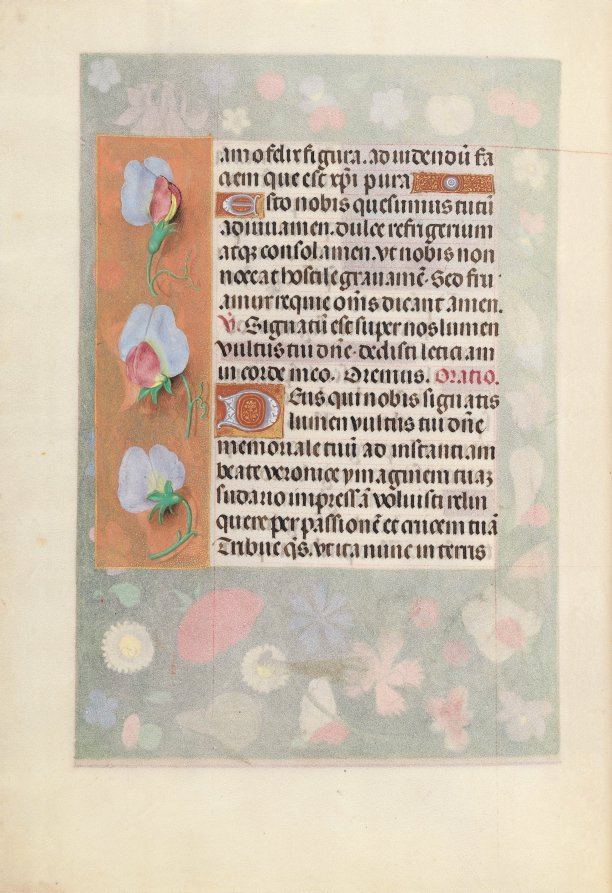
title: Hours of Queen Isabella the Catholic, Queen of Spain: Fol. 15v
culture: Flanders, Ghent and Bruges, late 15th century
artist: Master of the First Prayerbook of Maximillian (Flemish, c. 1444–1519)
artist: and Associates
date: c. 1500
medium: ink, tempera, and gold on vellum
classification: Bound Volume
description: This manuscript was illuminated by a circle of at least five highly organized manuscript painters active in the Flemish cities of Ghent and Bruges. The principal illuminator was Alexander Bening, who painted the majority of the book's miniatures. Manuscripts produced by this circle of artists are renowned for the decoration of their borders, which typically feature a rich variety of realistically-painted flowers, birds, and butterflies. This prayer book, called a book of hours, was intended not for a cleric, but for the private devotions of a lay person-in this case, Isabella the Catholic, Queen of Spain (1451-1504). Isabella's coat of arms embellishes the book's frontispiece. It is unlikely that the book was commissioned by the Queen herself; rather, she probably received it as a diplomatic gift from someone courting her patronage, perhaps Cardinal Francisco Jimenez de Cisneros. A Franciscan friar, Jimenez was dependent upon Isabella for his advancement, first to the post of Queen's confessor in 1492, and then to Archbishop of Toledo in 1495.